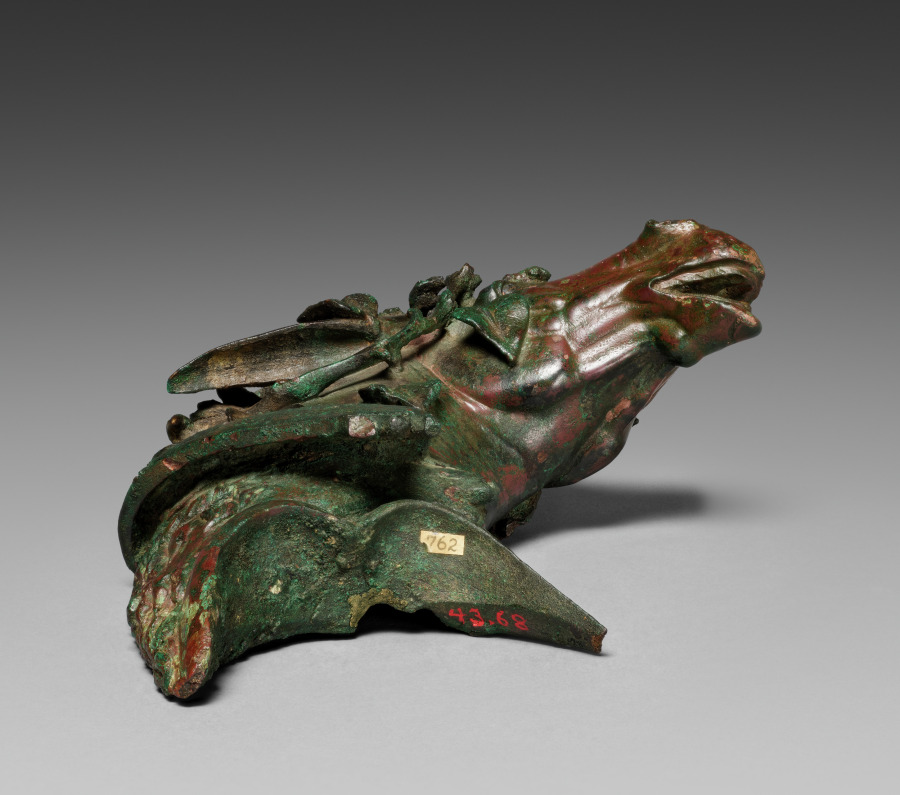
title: Mule-Head Attachment for a Couch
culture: Greece, Hellenistic period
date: 200–100 BCE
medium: bronze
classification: Sculpture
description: This bronze attachment in the shape of a mule’s head was once part of a fulcrum (armrest) for a banqueting couch. The mule’s mane flies upward, its mouth open and its ears pushed back against its head. The mule wears an ivy garland and a saddlecloth made from panther skin, two elements associated with the wine god Dionysos.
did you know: The pattern on the panther skin, called a meander, was also extremely popular on Greek pottery.